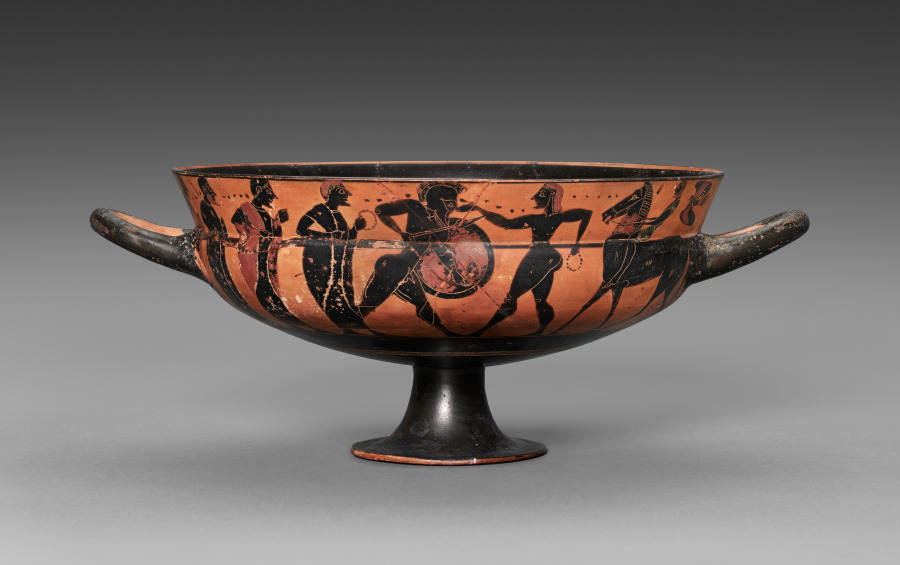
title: Siana Cup (Black-Figure Kylix [Drinking Cup]): Horseman and Warriors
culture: Greek, Attic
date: 575–550 BCE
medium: ceramic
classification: Ceramic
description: Two kneeling warriors do battle in the tondo of this large drinking cup, red blood streaming from their wounded legs. Without labels or attributes, their identities remain uncertain—perhaps Eteokles and Polyneikes, the cursed sons of Oedipus. The exterior figures are anonymous, although many are accompanied by small dots probably meant to imitate letters (for identifying inscriptions). On one side, a warrior is greeted by a nude youth holding a garland, with a horseman, a flying eagle, and several men observing. On the other, a bearded man rides a rearing horse, flanked by six draped men. Waterbirds stand beneath the handles.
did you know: Siana cups take their name from a cemetery in Rhodes where many were first found.